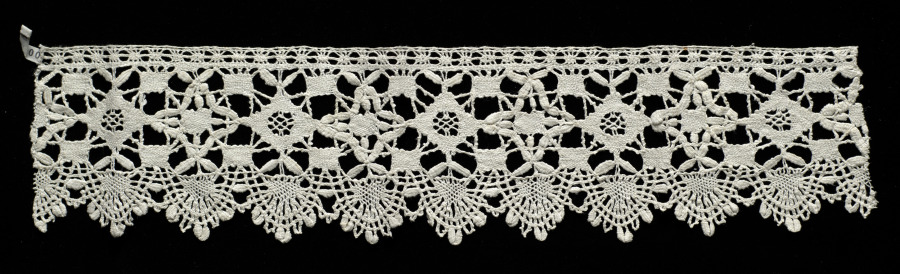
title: Lace Insertion and Edging of Points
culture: Italy, Genoa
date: 1600s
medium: Bobbin lace (needle lace, cutwork design)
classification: Lace